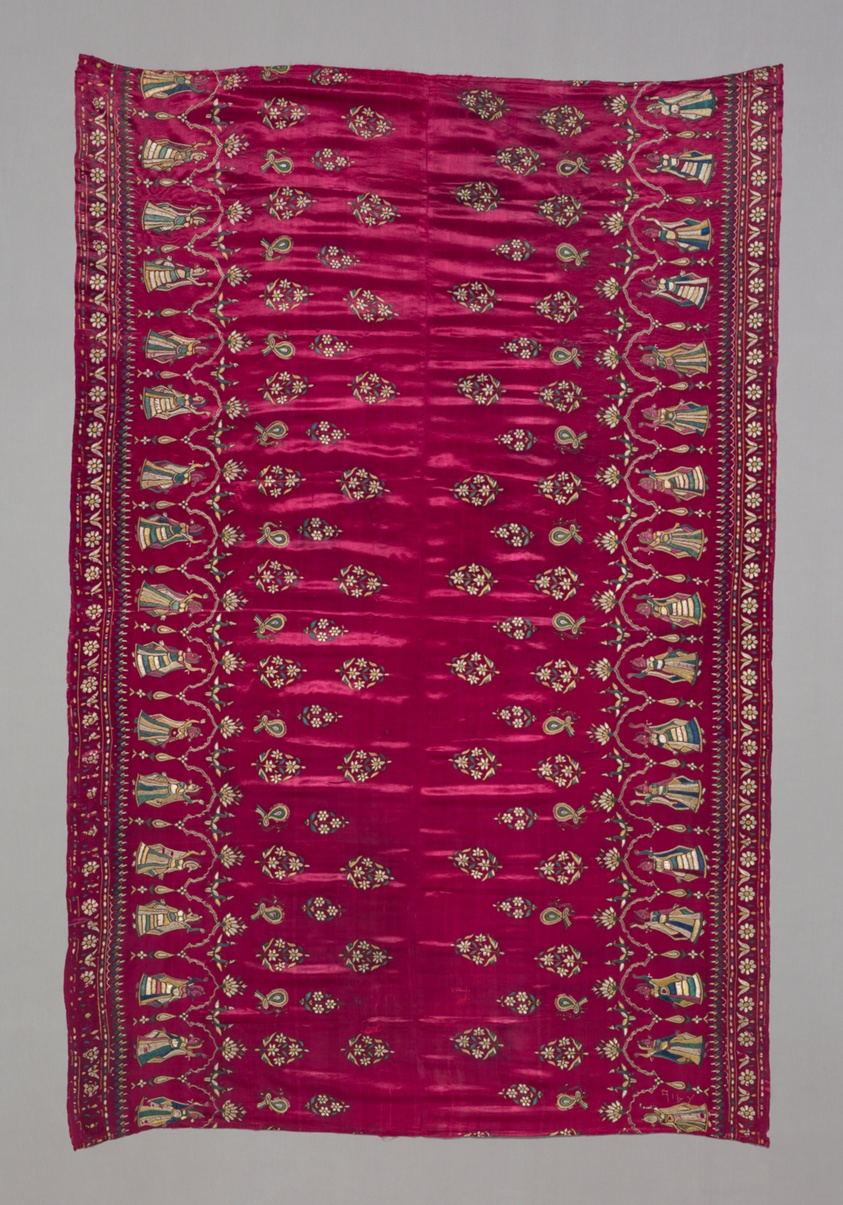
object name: Textile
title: Two Panels (Joined)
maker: India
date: 19th century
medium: Silk, satin weave; embroidered with silk in chain and closed feather stitches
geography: India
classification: textile; needlework (visual works)